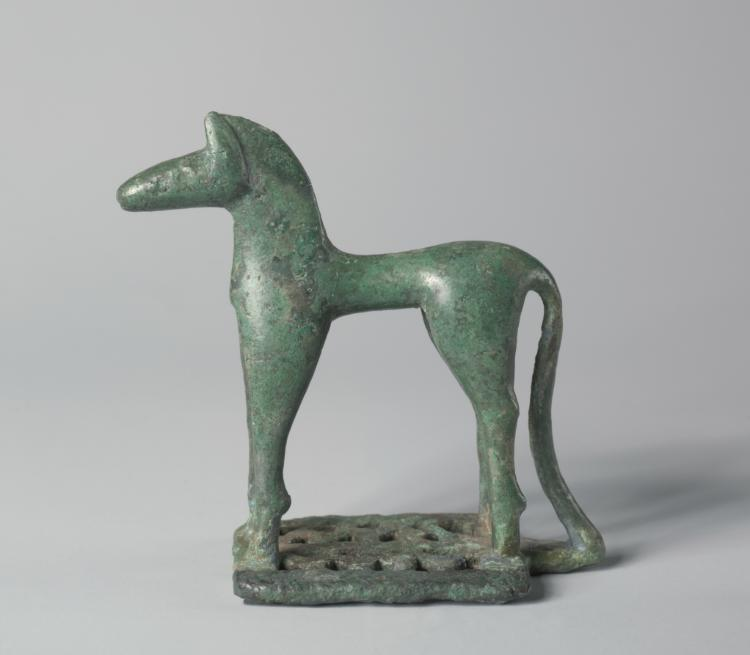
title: Statuette of a Horse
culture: Greek, Geometric, probably Arcadian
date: 750–725 BCE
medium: bronze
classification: Sculpture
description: A small but powerful status symbol, this solid-cast horse may have served as a dedication in a Greek religious sanctuary. The long tail helps to steady the figurine for standing, but the perforated base also suggests suspension, perhaps from a tree or sanctuary structure. With their balanced proportions and radically stylized silhouettes, such horses epitomize the clarity of Greek Geometric design.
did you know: Horses were among the most frequently depicted creatures in the Greek Geometric period.